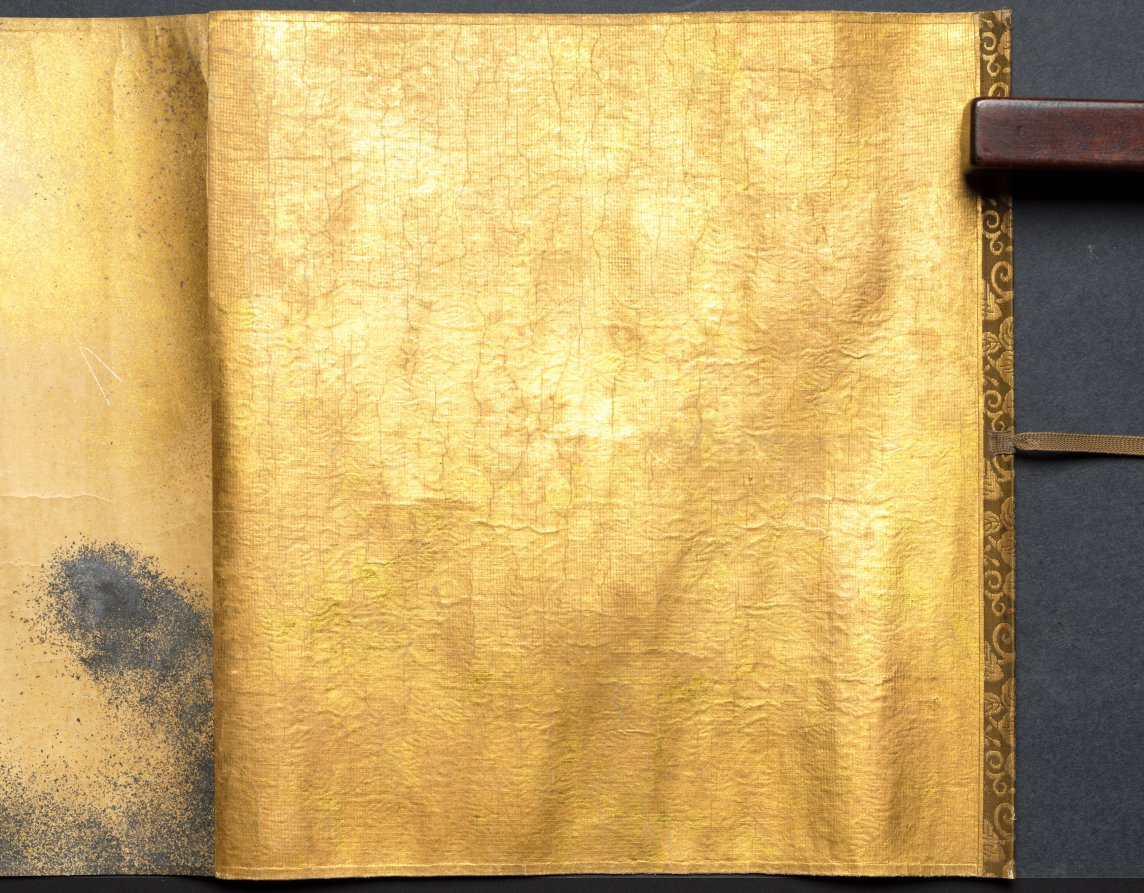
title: People Fleeing from a Fire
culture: Japan, Edo period (1615–1868)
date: 1615–1868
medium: Handscroll; color and gold on paper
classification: Painting